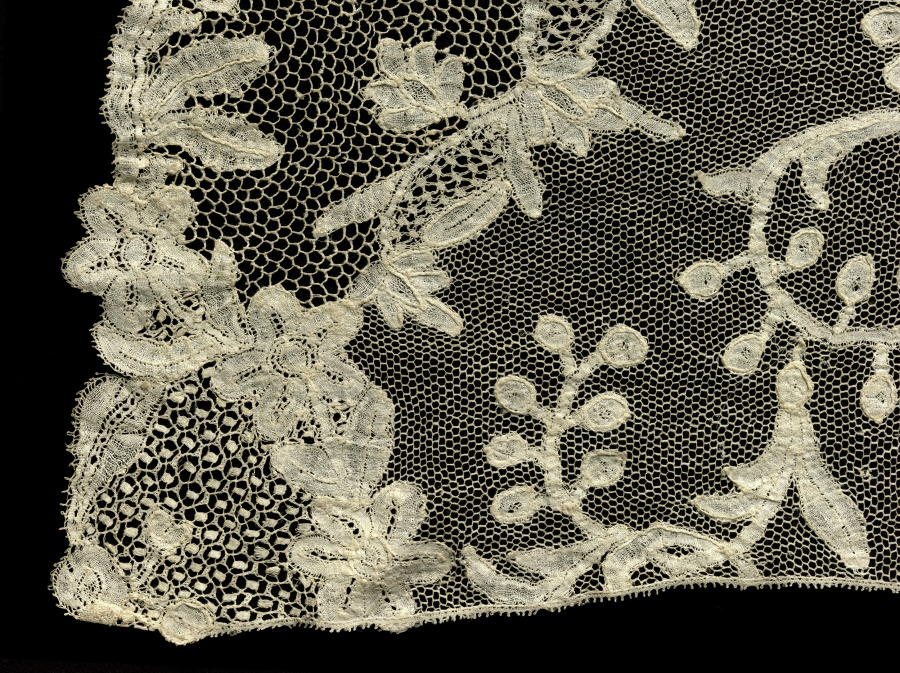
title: Fragment of a Lace Flounce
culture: Belgium, Brussels(?)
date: 1700s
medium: lace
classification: Lace